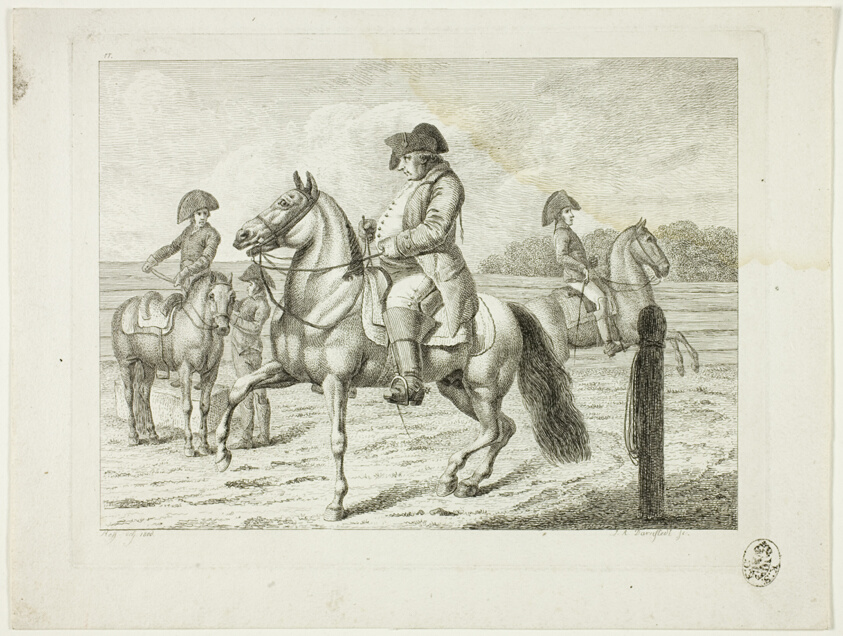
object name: Print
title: Riding School and Horses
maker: Johann Adolph Darnstedt (German, 1769-1844)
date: 1806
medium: Etching on ivory wove paper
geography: Germany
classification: etching; prints and drawing; print